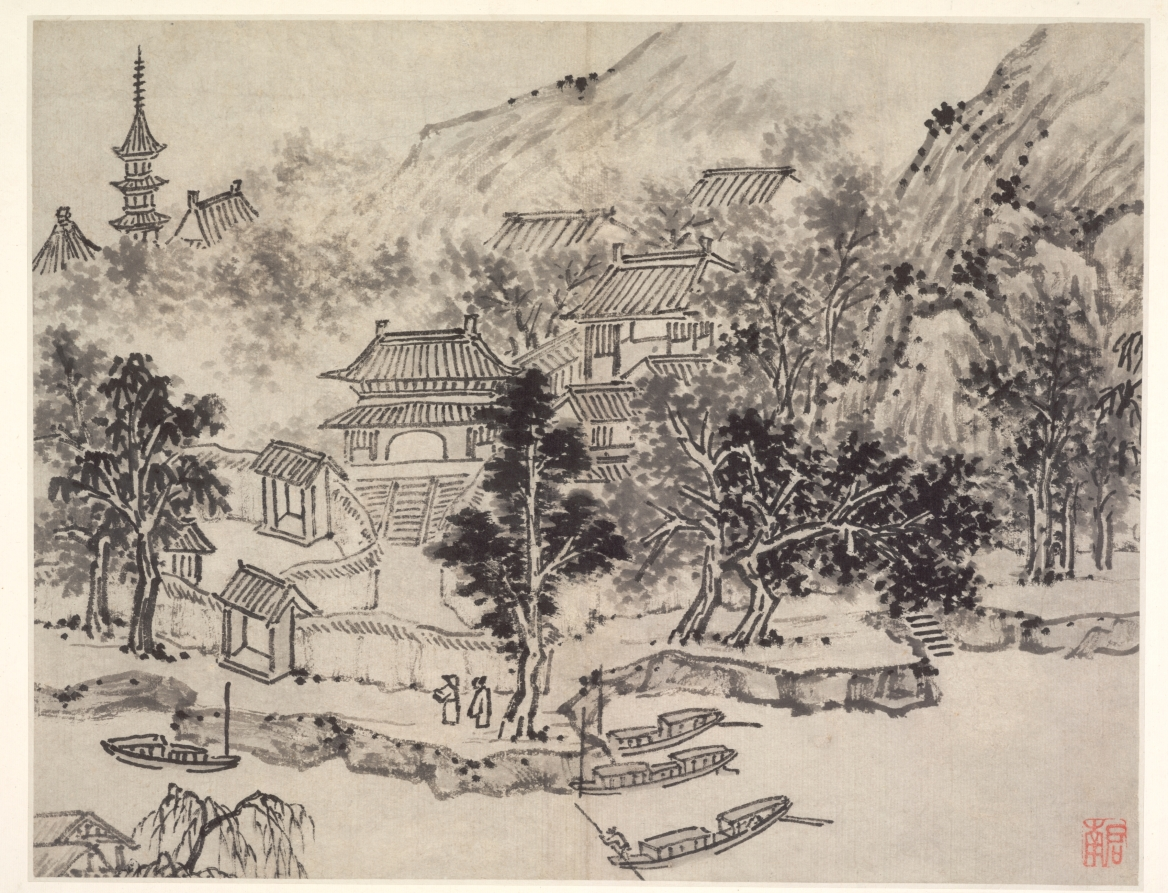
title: Distant View of Tiger Hill from the Canal Mooring, from Twelve Views of Tiger Hill, Suzhou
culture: China, Ming dynasty (1368–1644)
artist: Shen Zhou (Chinese, 1427–1509)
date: after 1490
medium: Album leaf; ink on paper or ink and slight color on paper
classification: Painting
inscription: [印] 启南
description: Views of Tiger Hill depicts a historic site a few miles northwest of Suzhou. The scenes simulate a visit from arriving by boat at the foot of the mountain to climbing to Cloudy Cliff Monastery. Representations of the artist’s mature style, Shen Zhou included views in subtle colors in the suite of monochrome scenes. A Suzhou native, Shen Zhou was supported by family wealth and rejected an official career in favor of life as a retired scholar. Turning to painting in midlife, he is regarded as the founder of the Wu School of painting, with its center in Suzhou.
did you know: Here Shen Zhou depicted the view from the canal toward the Pagoda of the Cloudy Cliff Monastery, seen from afar. The history of Tiger Hill can be traced to the State of Wu (about 5th century BCE).